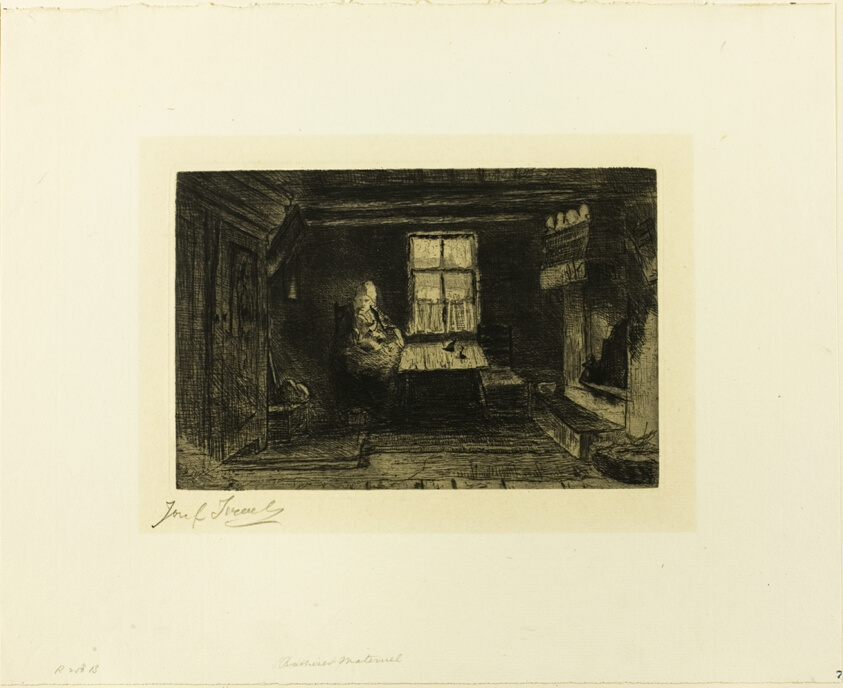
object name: Print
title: The Mother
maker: Jozef Israëls (Dutch, 1824-1911)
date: c. 1890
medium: Etching on paper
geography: Holland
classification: etching; print; prints and drawing